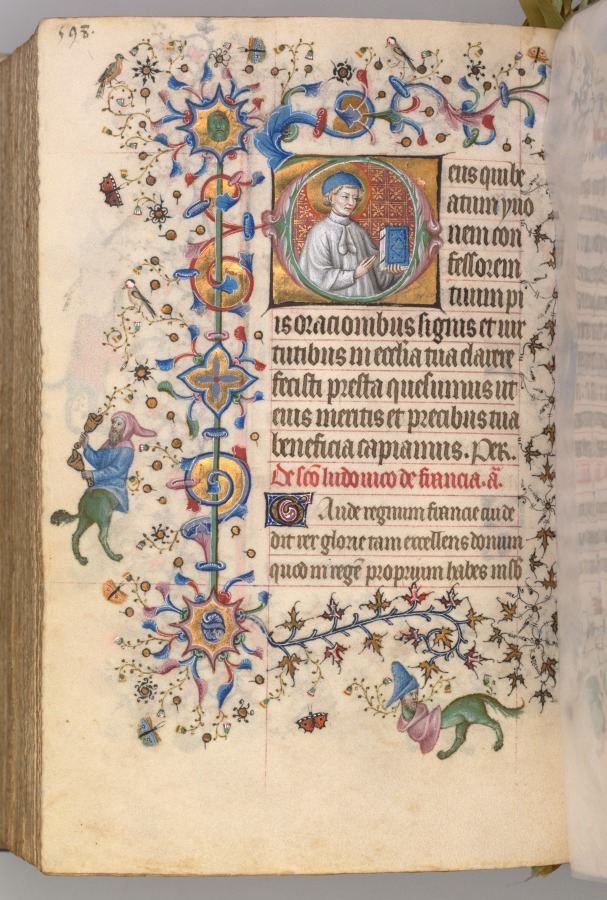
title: Hours of Charles the Noble, King of Navarre (1361-1425): fol. 293v, St. Yoon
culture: France, Paris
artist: Master of the Brussels Initials and Associates (French)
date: c. 1405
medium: ink, tempera, and gold on vellum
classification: Bound Volume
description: This precious volume was obviously highly prized by its owner, the French-born King of Navarre, who had his coat of arms painted on no less than twenty folios. Rather than directly commissioning this manuscript from a specific workshop, it seems that Charles the Noble acquired his book of hours -- perhaps ready-made for the luxury market -- while on a trip to Paris in 1404-05. A collaborative effort, six painting styles are evidenced within the pages of this codex, those of two Italians, two Frenchmen, and two Netherlanders. The painter who was responsible for the planning and decoration of the book, and who produced seventeen of the large miniatures, was a Bolognese artist known as the Master of the Brussels Initials. His principal assistant, responsible for most of the borders, was a Florentine who signed his name "Zecho" da Firenze on folio 208 verso.